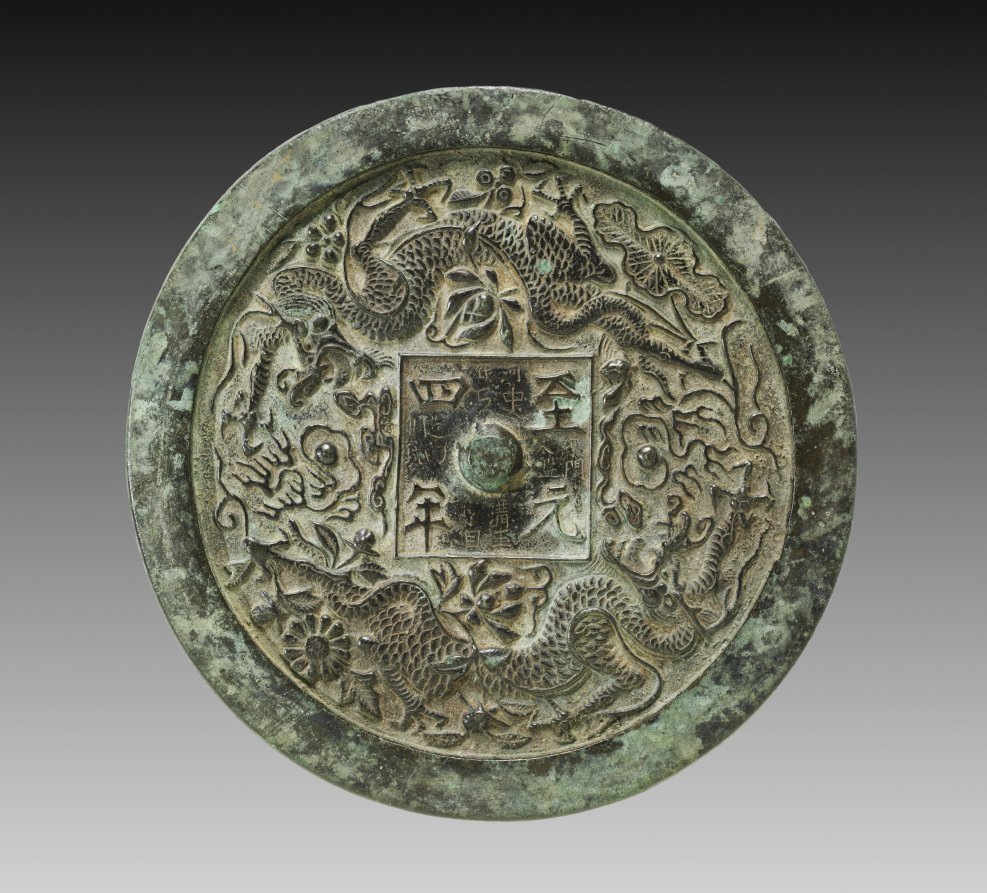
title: Mirror with Twin Dragons and Lotus Blossoms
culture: China, Shanxi province, Hezhong, Yuan dynasty (1271-1368)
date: 1338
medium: bronze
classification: Metalwork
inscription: 河中府馬溝玉家自家門人監造白銅鏡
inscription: 至元四年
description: The mirror features a pair of dragons poised to seize flaming pearls. Blossoms like lotus and chrysanthemum emerge among the dragons. Surrounding the central knob of the mirror is a square enclosing the characters "至元四年 (Fourth Year of Zhiyuan, 1338)." The square also encompasses a barely legible engraving which identifies the workshop in today’s Shanxi province: "White bronze mirror cast under the supervision of retainers from the house of Ma Gouyu in the prefecture of Hezhong."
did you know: This intricate mirror was donated in honor of Sherman Lee, the museum's longest tenured director.